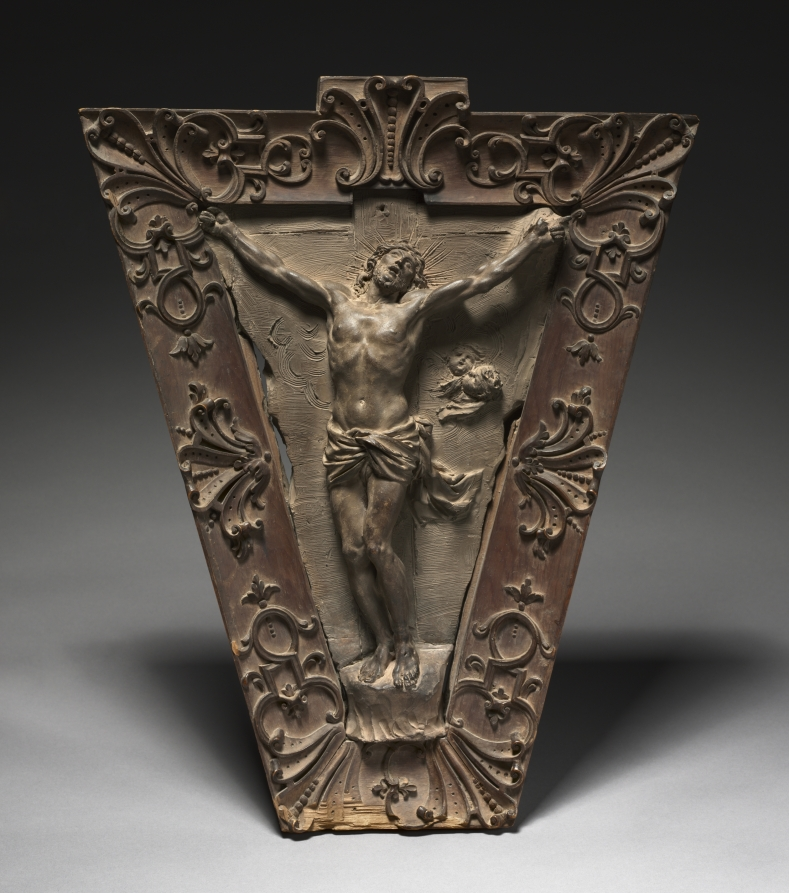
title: Crucifixion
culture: (Southern?) France, 17th century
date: c. 1680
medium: terracotta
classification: Sculpture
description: This work is quite atypical for the period due to its physiognomy and composition: Christ's figure is stout in comparison to the slender, elongated figures more common at the time. This effect is compounded by the tight focus of the composition; the artist emphasizes Christ by minimizing background and ornamentation. The design is adapted from an engraving after Charles Le Brun (1619–1690) who studied in Rome and became primary painter to Louis XIV of France. The innovative, simplistic approach of the relief contrasts to the style that Le Brun championed as head of the French Academy. Scholars dispute the legitimacy of the frame as original to the piece, due to its emphatic decoration compared to the solemn relief.